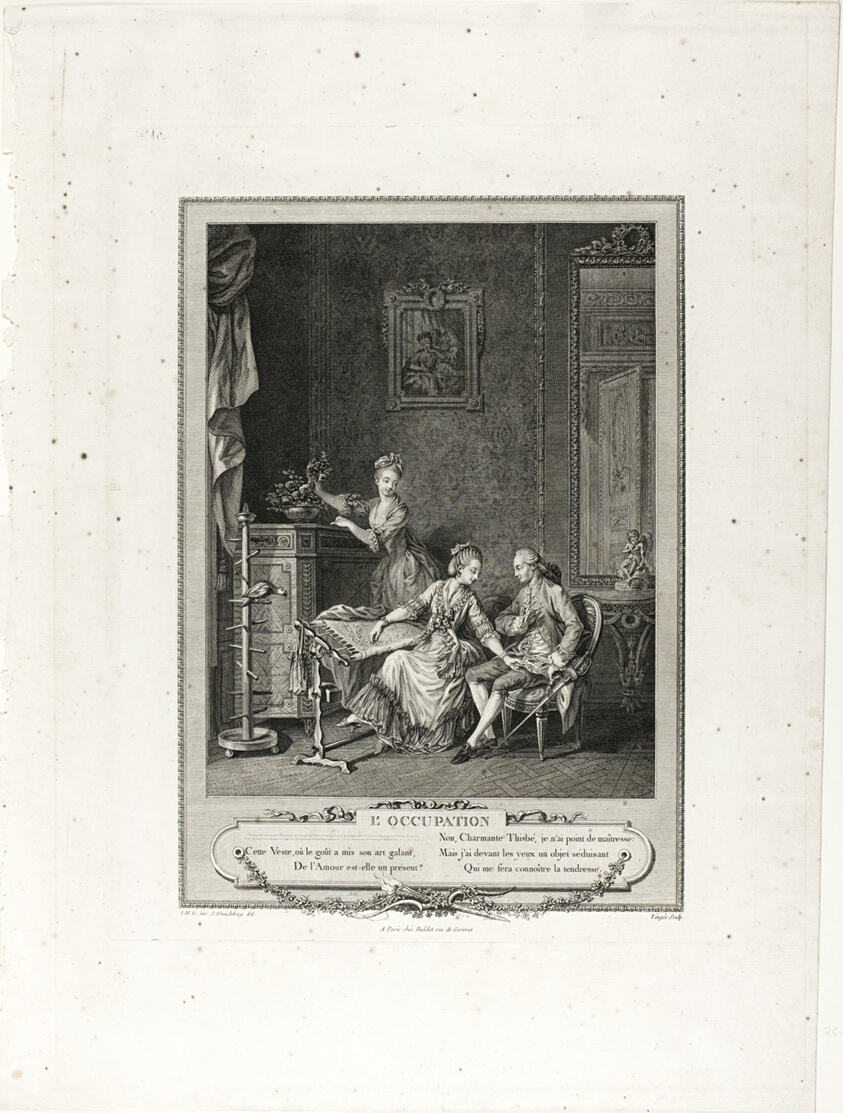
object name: Print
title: The Occupation, from Monument du Costume Physique et Moral de la fin du Dix-huitième siècle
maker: Charles Louis Lingée (French, 1748-1819); after Sigmund Freudeberg (Swiss, 1745-1801) and Jean Henri Eberts (Swiss, 18th century); published by Laurent-François Prault (French 1712-1780)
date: 1774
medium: Engraving and etching in black ink on cream laid paper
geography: France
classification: etching; print; prints and drawing